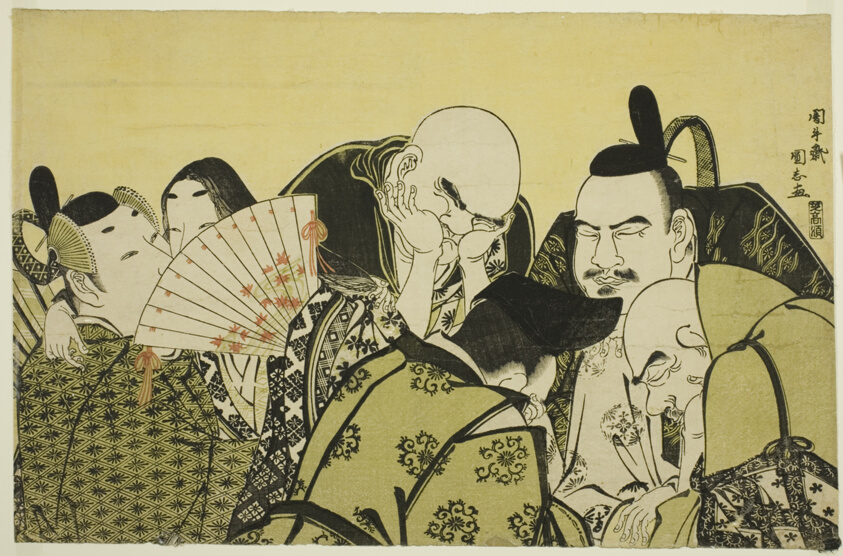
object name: Print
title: Rokkasen (Six Immortal Poets)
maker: Angyusai Enshi; Japanese, active 1785-1795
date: c.1795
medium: Color woodblock print; oban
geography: Japan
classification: woodblock print; print; asian art